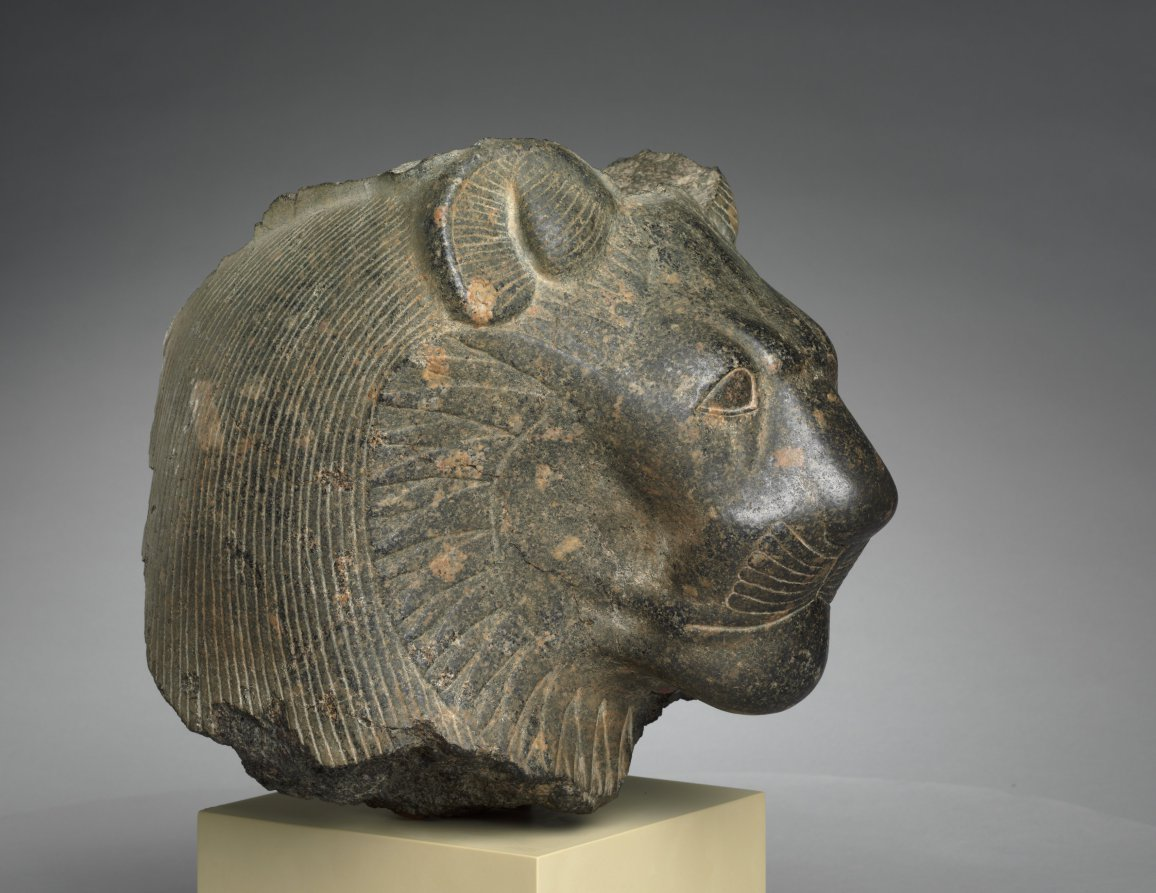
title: Head of Sekhmet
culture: Egypt, Thebes(?), New Kingdom (1540–1069 BCE), Dynasty 18, reign of Amenhotep III (1390–1352 BCE)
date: c. 1391–1353 BCE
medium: granodiorite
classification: Sculpture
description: This lioness head once belonged to a grand statue of the goddess Sekhmet, "the powerful one," probably seated and wearing a tight dress. Possibly appealing to her healing aspect, Pharaoh Amenhotep III, often described as “beloved of Sekhmet,” commissioned and dedicated hundreds of large granodiorite Sekhmet sculptures in his Theban mortuary temple. Thus, this head likely comes from Thebes, perhaps later moved across the Nile—like many such sculptures—to the temple of Mut, a related deity, at Karnak. Behind her stylized ruff, Sekhmet wears a wig, once crowned with a sun disk and uraeus, the stylized cobra symbolizing royal or divine power.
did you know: Amenhotep III may have dedicated 730 statues of Sekhmet, two for each day of the year.